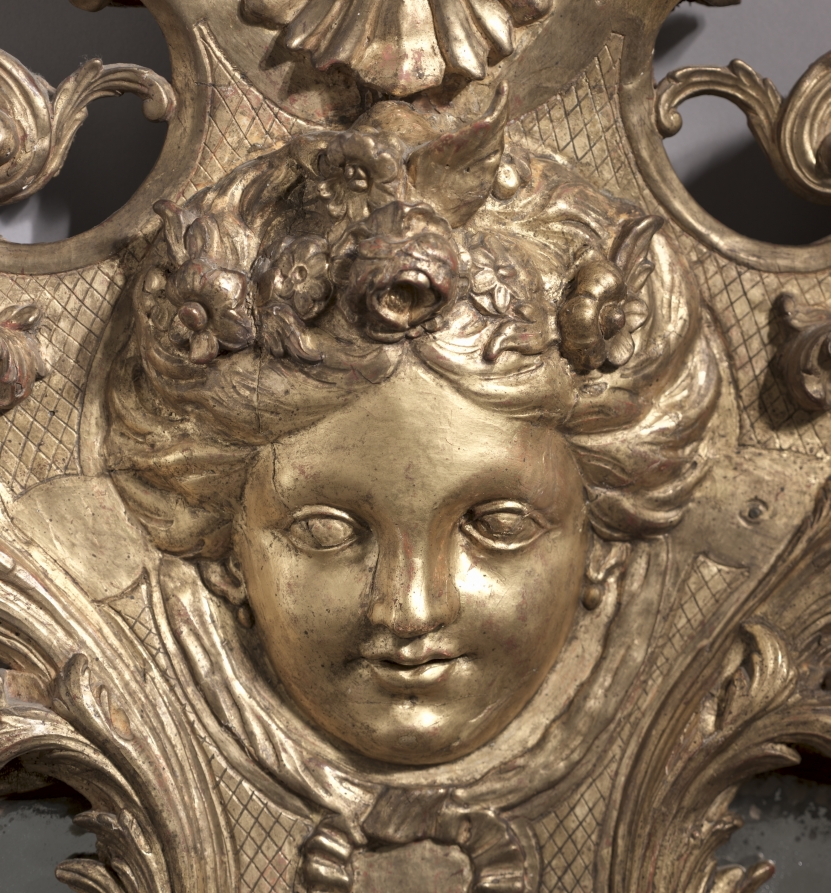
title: Wall Mirror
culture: France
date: c. 1720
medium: carved and gilded wood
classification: Furniture and woodwork